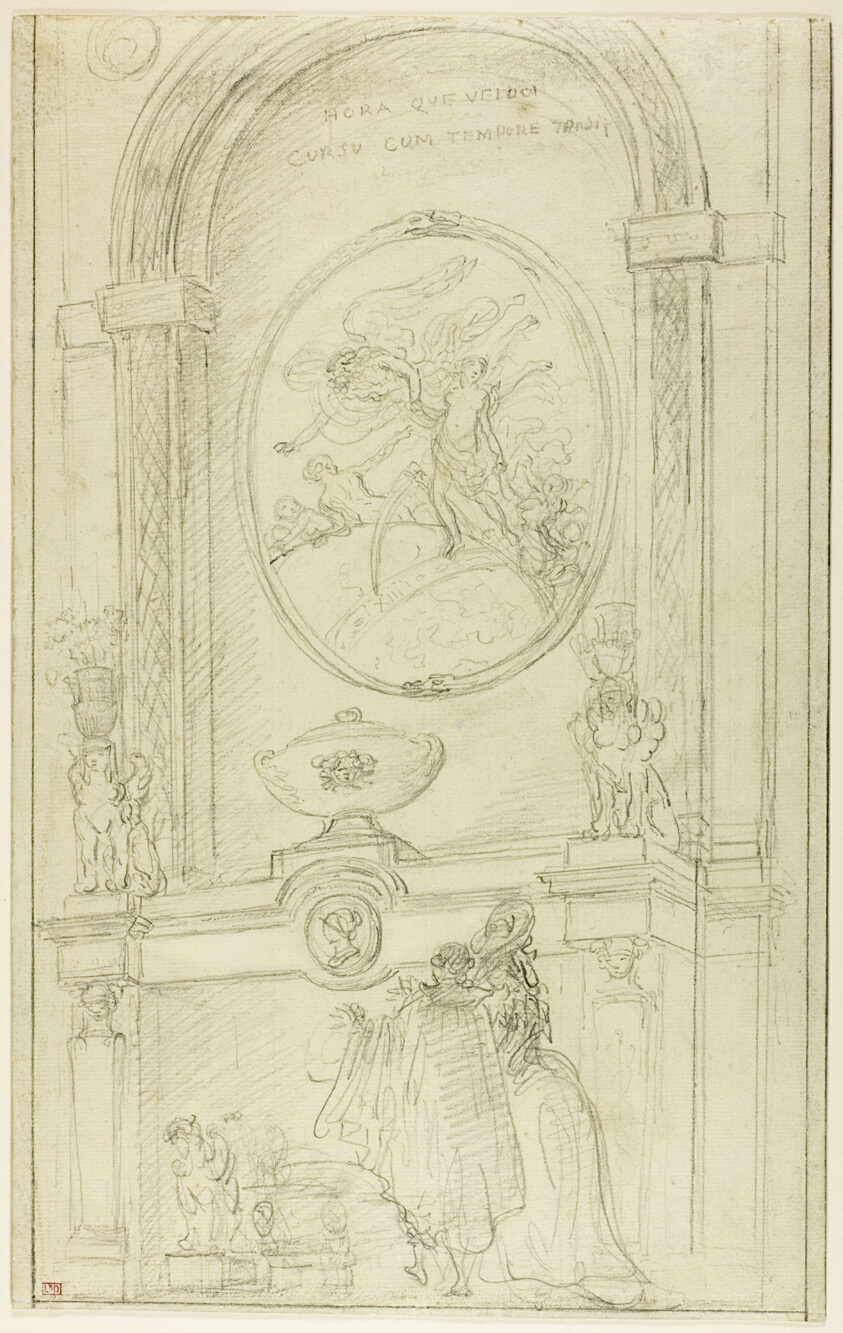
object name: Drawing and Watercolor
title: Interior with a Couple Before a Chimney-Piece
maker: Hubert Robert (French, 1733-1808)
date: c. 1785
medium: Graphite and black chalk, on ivory laid paper, laid down on cream wove board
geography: France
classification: graphite; drawings (visual works); prints and drawing